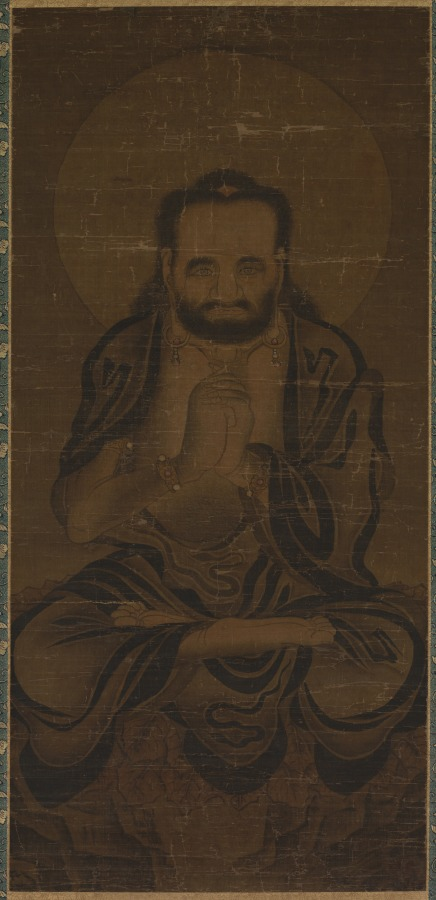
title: Sakyamuni Buddha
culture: China, Yuan dynasty (1271-1368)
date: 1300s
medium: Hanging scroll; ink and color on silk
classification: Painting